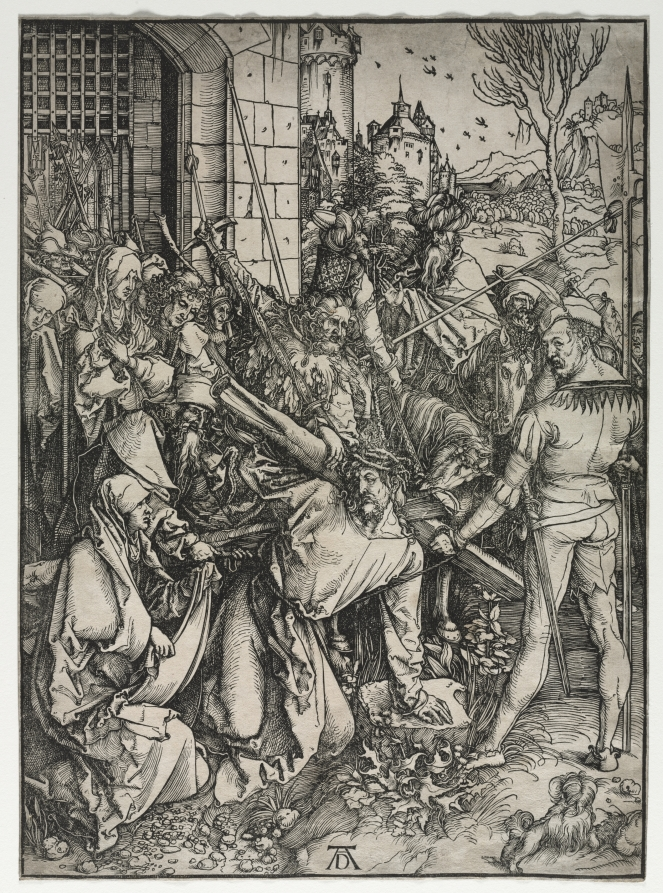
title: The Great Passion: Christ Bearing the Cross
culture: Germany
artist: Albrecht Dürer (German, 1471–1528)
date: c. 1497–1510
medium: woodcut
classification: Print